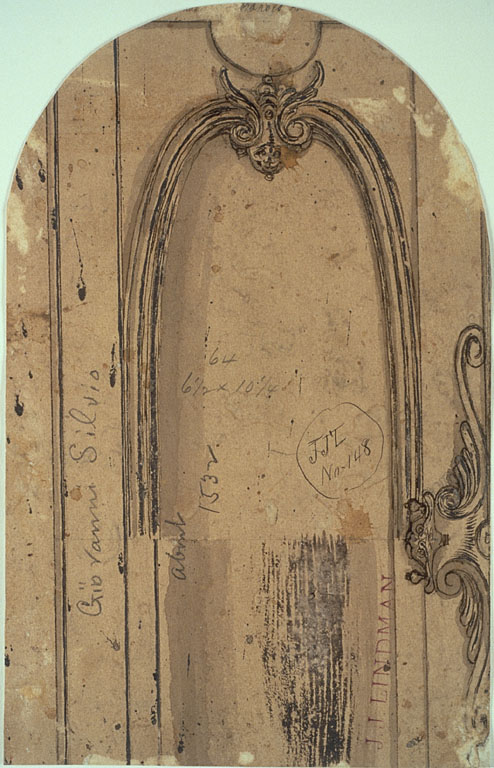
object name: Drawing and Watercolor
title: Vision of Saint Francis of Assisi at the Portiuncula (recto); Ornamental Design (verso)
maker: Circle of Alessandro Allori (Italian, 1535-1607)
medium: Pen and brown ink over black chalk (recto), and pen and brown ink with brush and brown and gray wash (verso) on lunette-shaped ivory laid paper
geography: Florence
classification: pen and ink drawings; drawings (visual works); prints and drawing